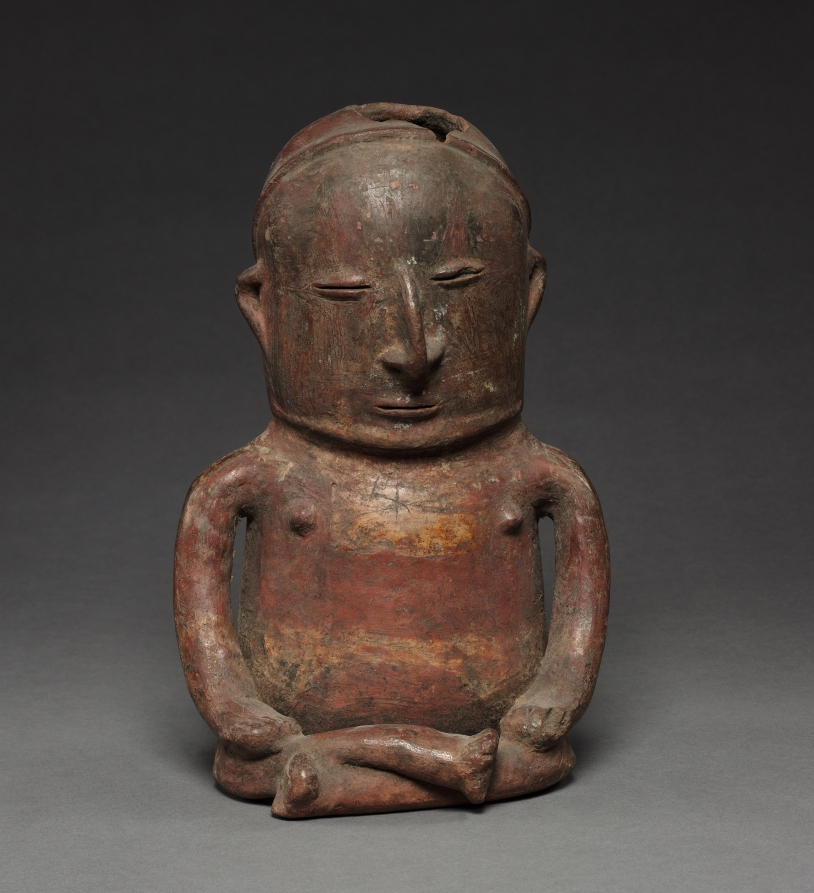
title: Seated Figure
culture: Colombia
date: before 1921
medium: red ware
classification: Ceramic